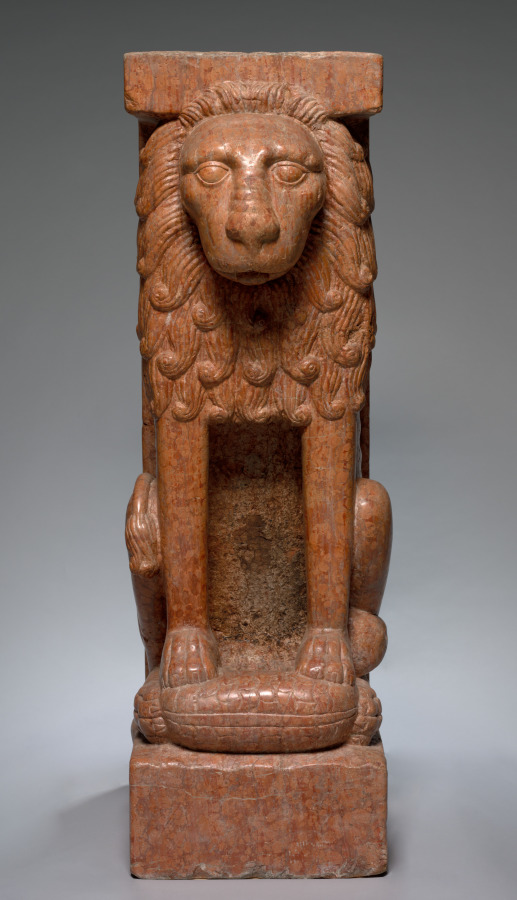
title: Supporting Lion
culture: Italy, style of the 13th century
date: style of the 1200s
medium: pink limestone (known as "Verona Marble")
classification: Sculpture